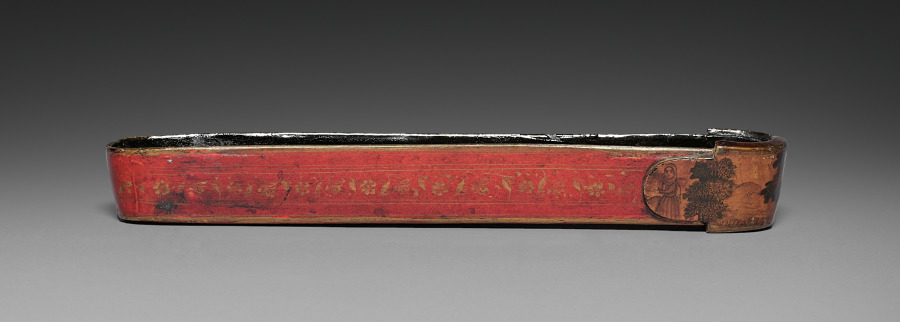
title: Pen and Ink Box (base)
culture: Iran, Qajar period (1779-1925)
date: 1800s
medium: lacquer over papier maché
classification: Lacquer